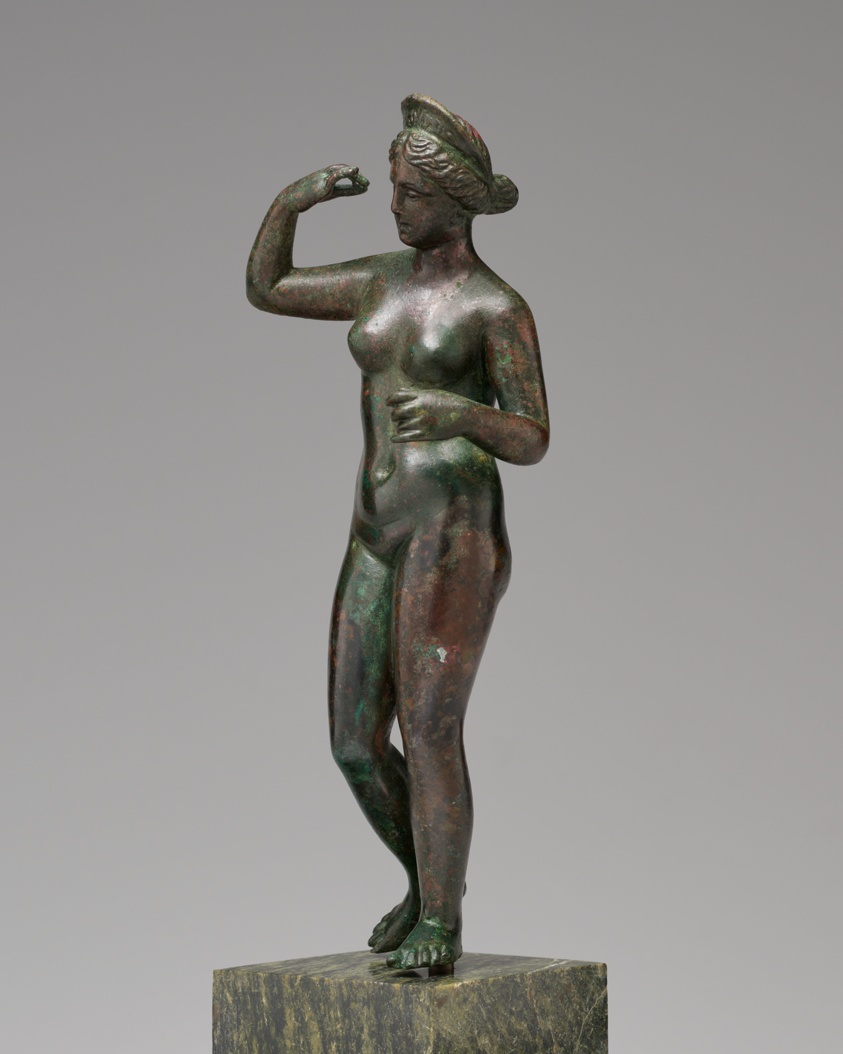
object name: Sculpture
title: Statuette of Venus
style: imperial (roman), ancient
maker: Roman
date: About 2nd century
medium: Bronze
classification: statuette; sculpture; ancient art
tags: goddesses, women, Aphrodite